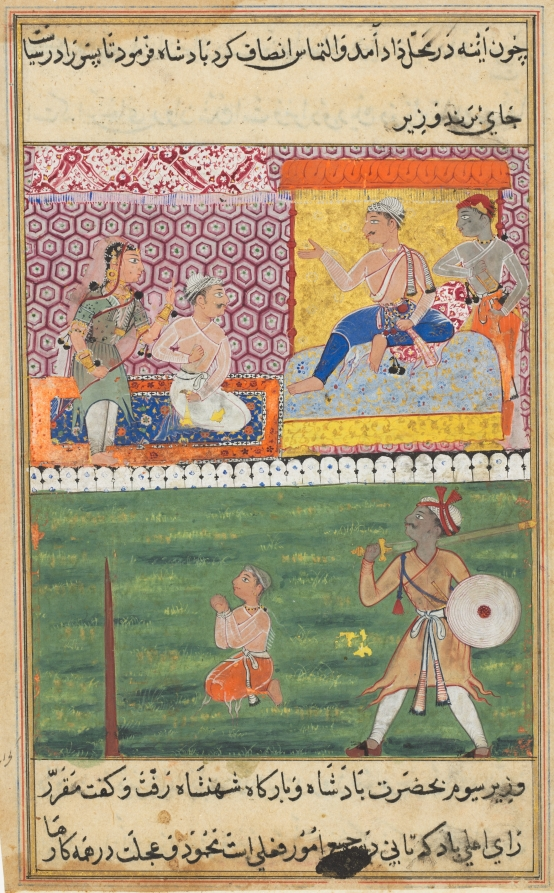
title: The handmaiden again appeals for justice and the prince is led to the place of execution for the third time, from a Tuti-nama (Tales of a Parrot): Eighth Night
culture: Mughal India, court of Akbar (reigned 1556–1605)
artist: Gujarati (Indian, active 1550s-1590s)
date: c. 1560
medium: gum tempera, ink, and gold on paper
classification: Painting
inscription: gujrā[ti]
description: In the upper register, the king’s handmaiden appears at the court to once again ask that the young prince be executed. Having taken a temporary vow of silence, the prince is unable to defend himself. He kneels with his hands bound awaiting execution. For the third time, one of the king’s viziers will step in to stall the execution.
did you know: A stake has been erected for the display of the prince’s severed head.